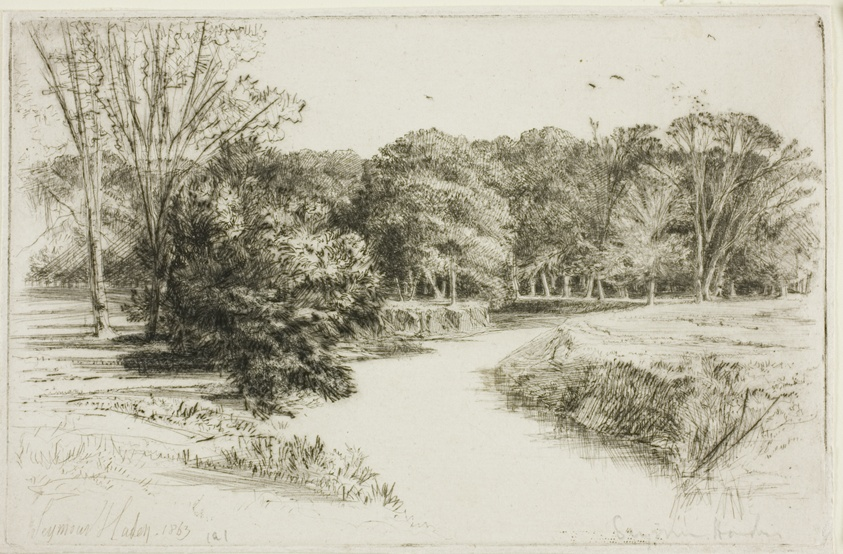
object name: Print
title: A Sunset in Ireland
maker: Francis Seymour Haden (English, 1818-1910)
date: 1863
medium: Etching and drypoint on ivory laid paper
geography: England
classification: etching; print; prints and drawing